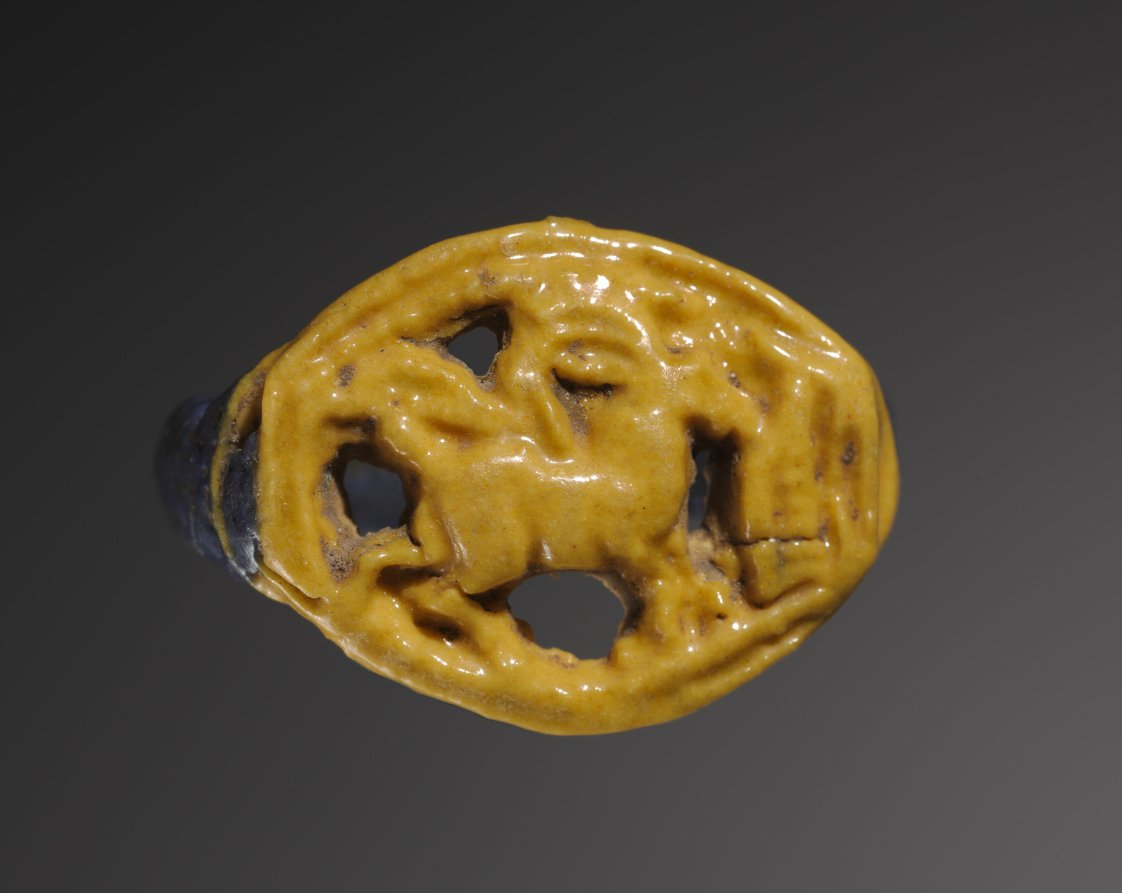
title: Ring: Gazelle Eating Thicket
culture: Egypt, New Kingdom (1540–1069 BCE), Dynasty 18, reign of Amenhotep III (1390–1352 BCE)–reign of Akhenaten (1351–1334 BCE)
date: 1391–1353 BCE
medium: polychrome faience (yellow and purple)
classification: Jewelry